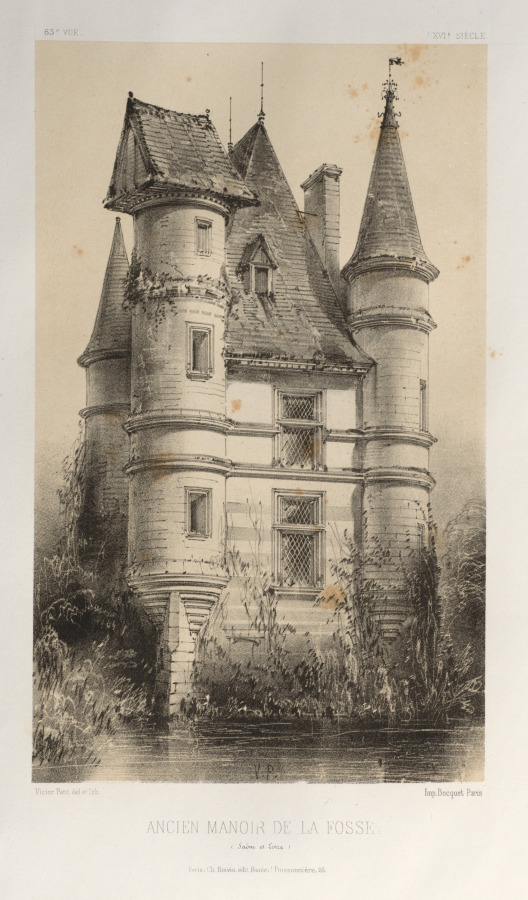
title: Architecture Pittoresque ou Monuments des XVeme. Et XVIeme. Siecles: Chateaux de France des XV et XVI Siecles: Pl. 63, Ancien Manoir De La Fosse (Saône et Loire)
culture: France, 19th century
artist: Victor Petit (French, 1817–1874)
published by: Charles Boivin (publisher and editor); Lith de Godard a Paris (printer)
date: 1860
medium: lithograph with tint stone, from portfolio of 100 lithographs with tint stone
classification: Print